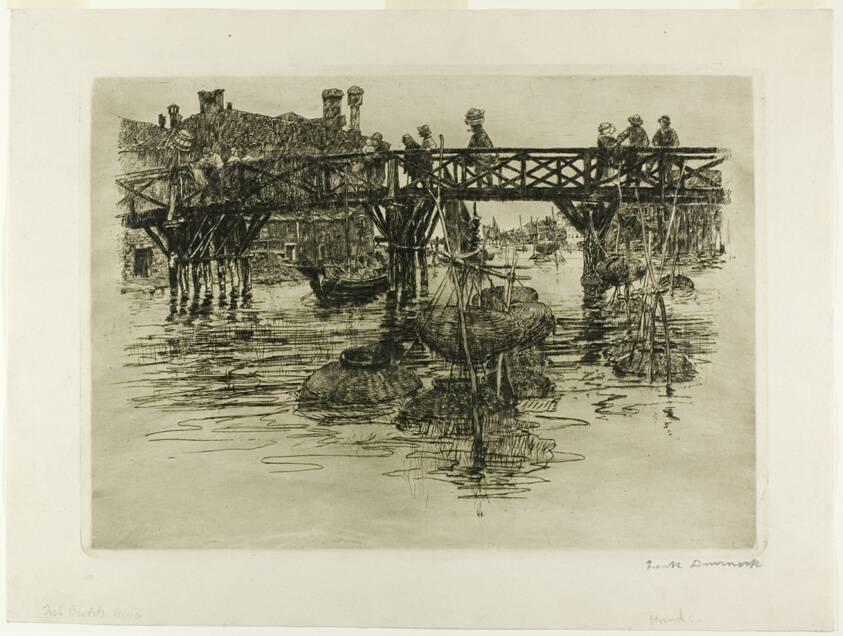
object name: Print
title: Fishing Quarter, Venice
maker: Frank Duveneck (American, 1848-1919)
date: 1883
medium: Etching and drypoint on ivory wove paper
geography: United States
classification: etching; drypoint; print; prints and drawing